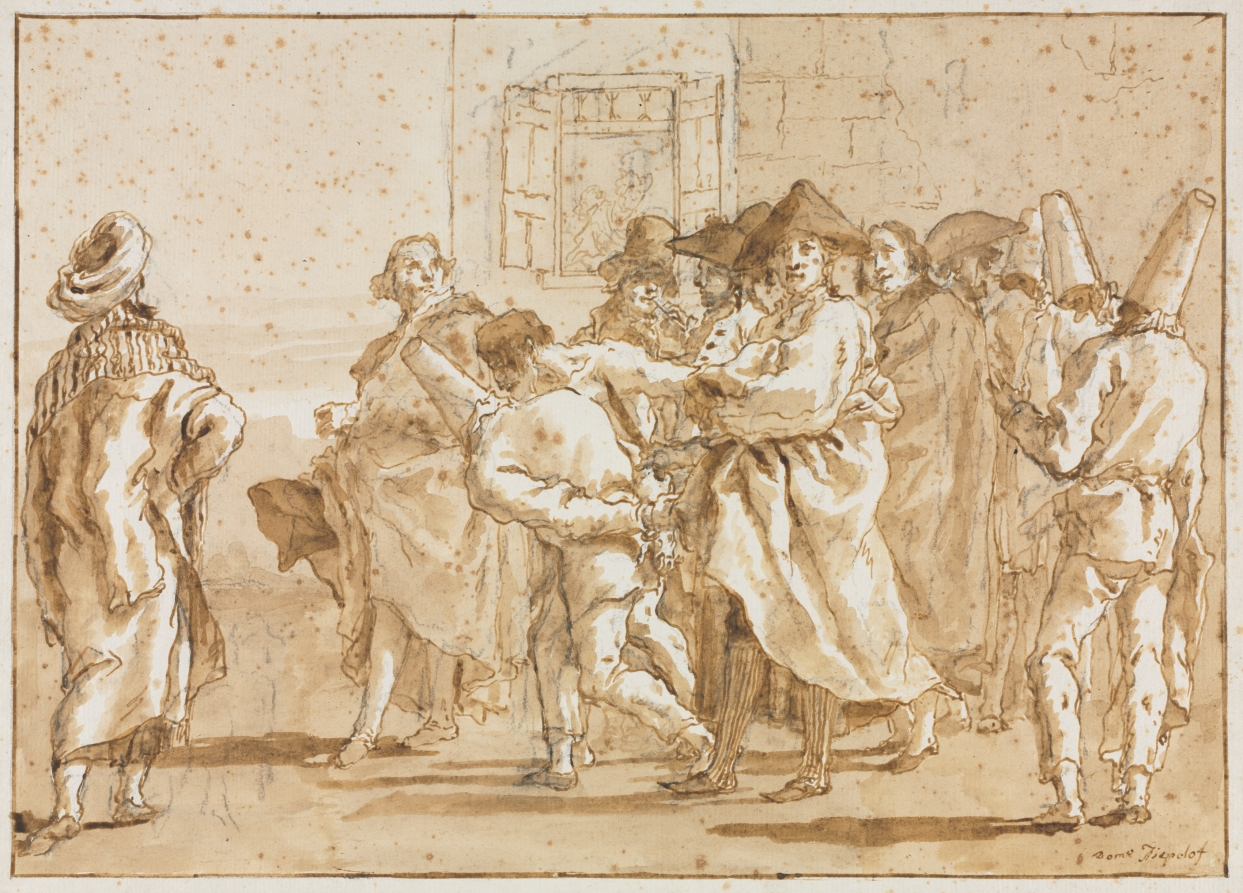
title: Punchinello Arrested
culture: Italy, 18th century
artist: Giovanni Domenico Tiepolo (Italian, 1727–1804)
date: 1790s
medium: pen and brown ink and brush and brown wash, with black chalk; framing lines in brown ink over graphite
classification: Drawing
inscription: signed, lower right, in brown ink: Dom° Tiepolo f ; upper left, in brown ink: 33 ; upper left, in graphite: - o ; VERSO, upper right, in blue crayon: 2